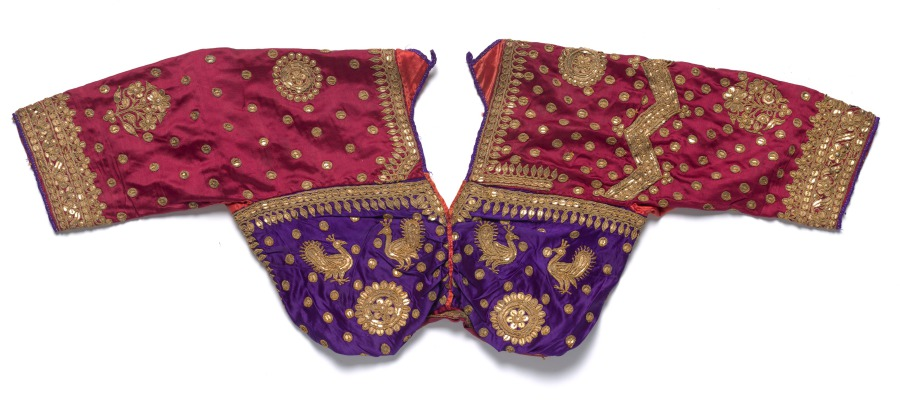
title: Bodice or Coli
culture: India, late 19th century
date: late 1800s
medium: embroidered satin with gold thread and sequins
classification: Garment